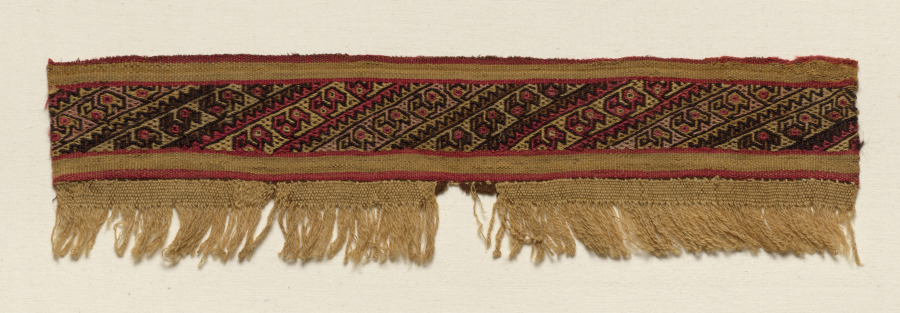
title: Three Fragments of a Border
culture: Peru, Central Coast, Chancay, 12th-15th century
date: c. 1100–1400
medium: tabby with inset border of fancy twill, brocaded; cotton and wool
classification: Textile